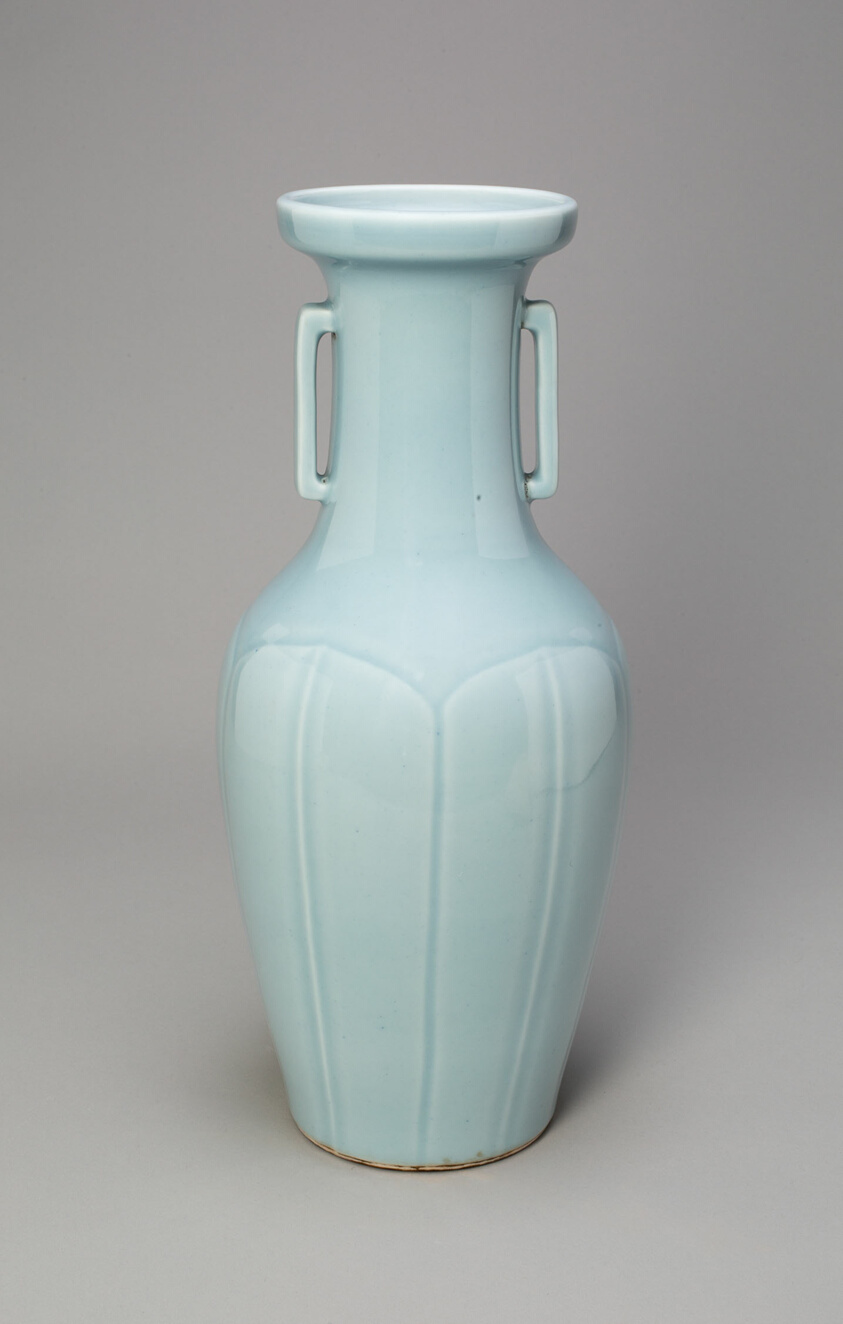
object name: Vessel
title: Vase with Rectangular Handles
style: Chinese (culture or style)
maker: China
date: Qing dynasty (1644–1911), Qianlong reign mark and period (1736–1795)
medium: Porcelain with pale lavender-blue (tianlan) glaze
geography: China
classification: vase; porcelain; vessel; asian art; ceramics